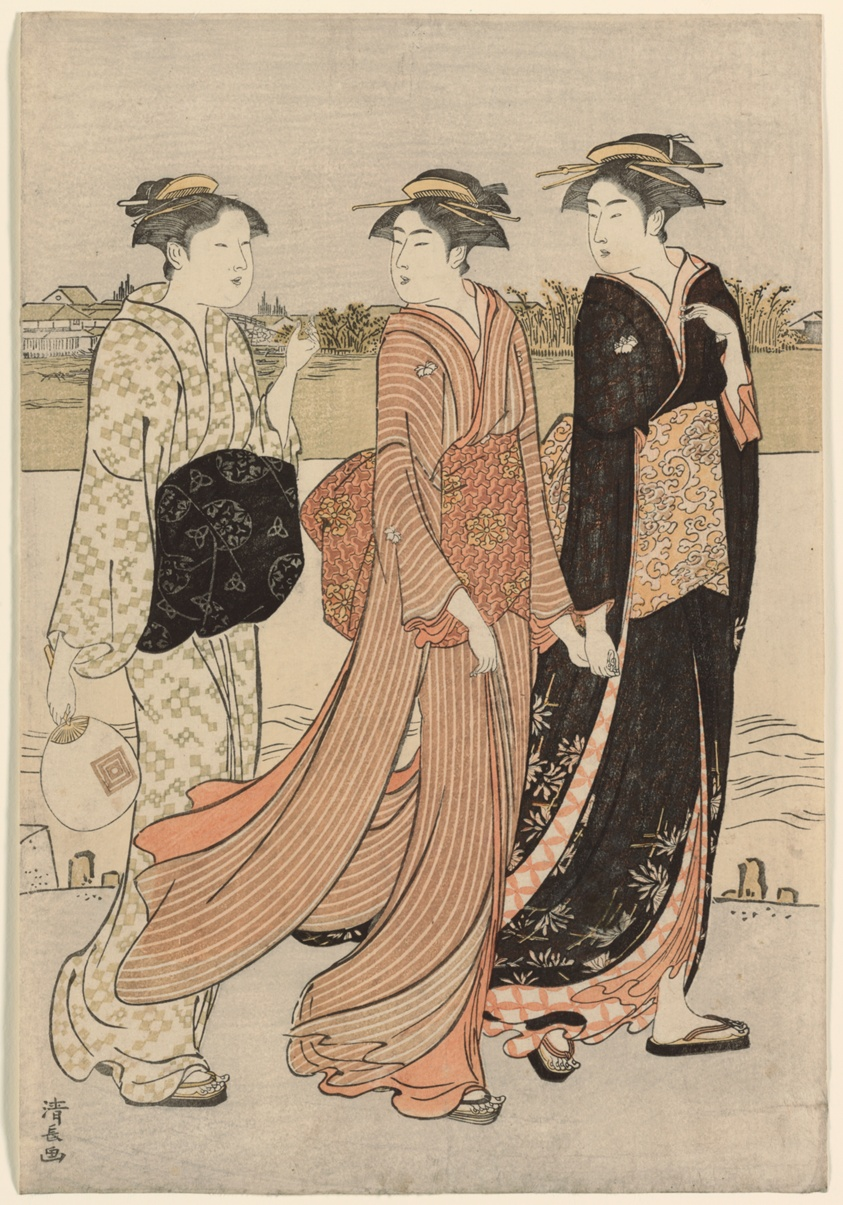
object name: Print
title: Summer Twilight on the Banks of the Sumida River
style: Japanese (culture or style)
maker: Torii Kiyonaga (Japanese, 1752-1815)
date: c. 1784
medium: Color woodblock print; left sheet of oban diptych (right sheet: 1925.2657)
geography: Japan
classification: woodblock print; print; asian art